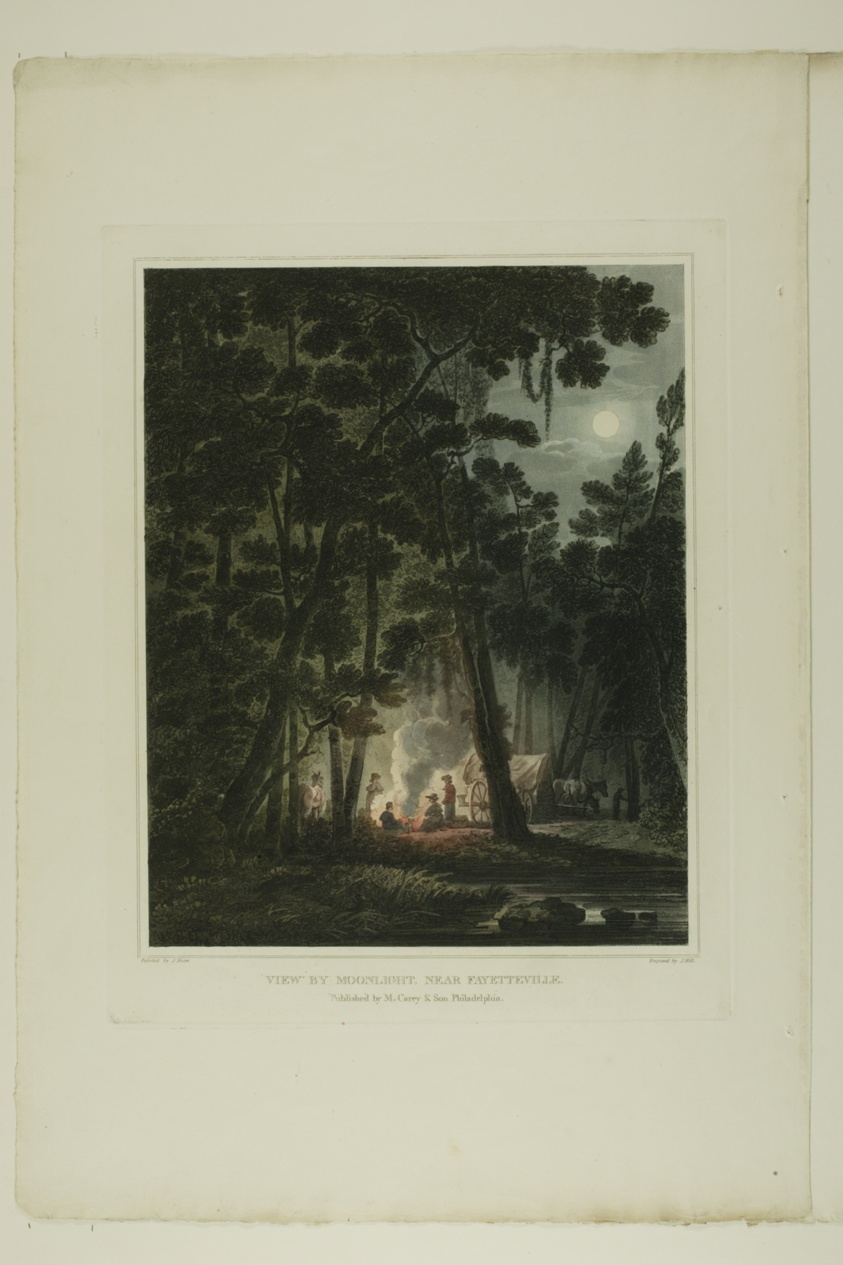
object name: Print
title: View By Moonlight, Near Fayetteville, plate three of the second number of Picturesque Views of American Scenery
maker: John Hill (American, 1770-1850); after Joshua Shaw (American, born England, c. 1777-1860); published by Matthew Carey & Son (American, active 1795-1821)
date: 1819/21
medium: Aquatint with etching and hand-coloring on cream wove paper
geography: United States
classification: aquatint; portfolio; prints and drawing; print